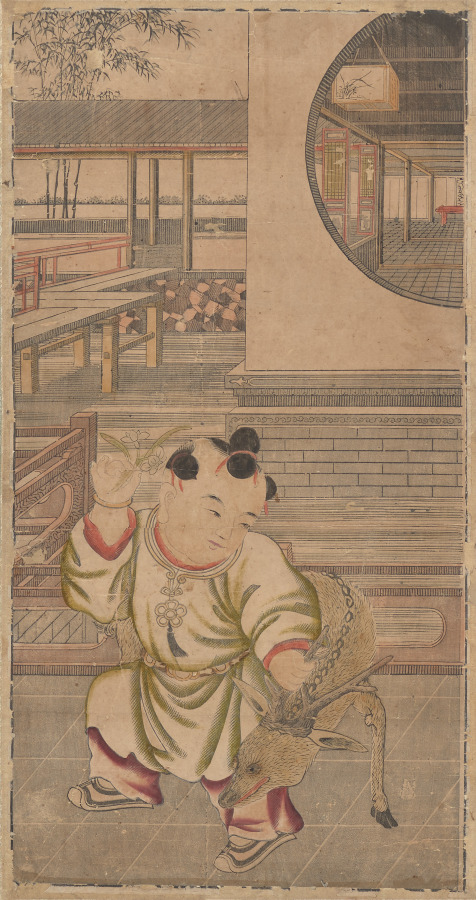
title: Rise in Rank and Attain Wealth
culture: China, Qing dynasty (1644–1911), Qianlong reign (1736–95)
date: 1736–95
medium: Hanging scroll; polychrome woodblock print; ink and color on paper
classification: Print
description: Woodblock printing in color reached a height in China in the 1600s to 1700s. The prints were executed by means of sets of separate blocks, each carved to print a different color.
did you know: In the 1600s, printing flourished in such Jiangnan cities as Nanjing, Suzhou, Hangzhou, and Huizhou, evolving from privately enjoyed illustrated books printed in color to more commercialized single-sheet color prints that were hung on walls and became part of the rich urban visual culture.